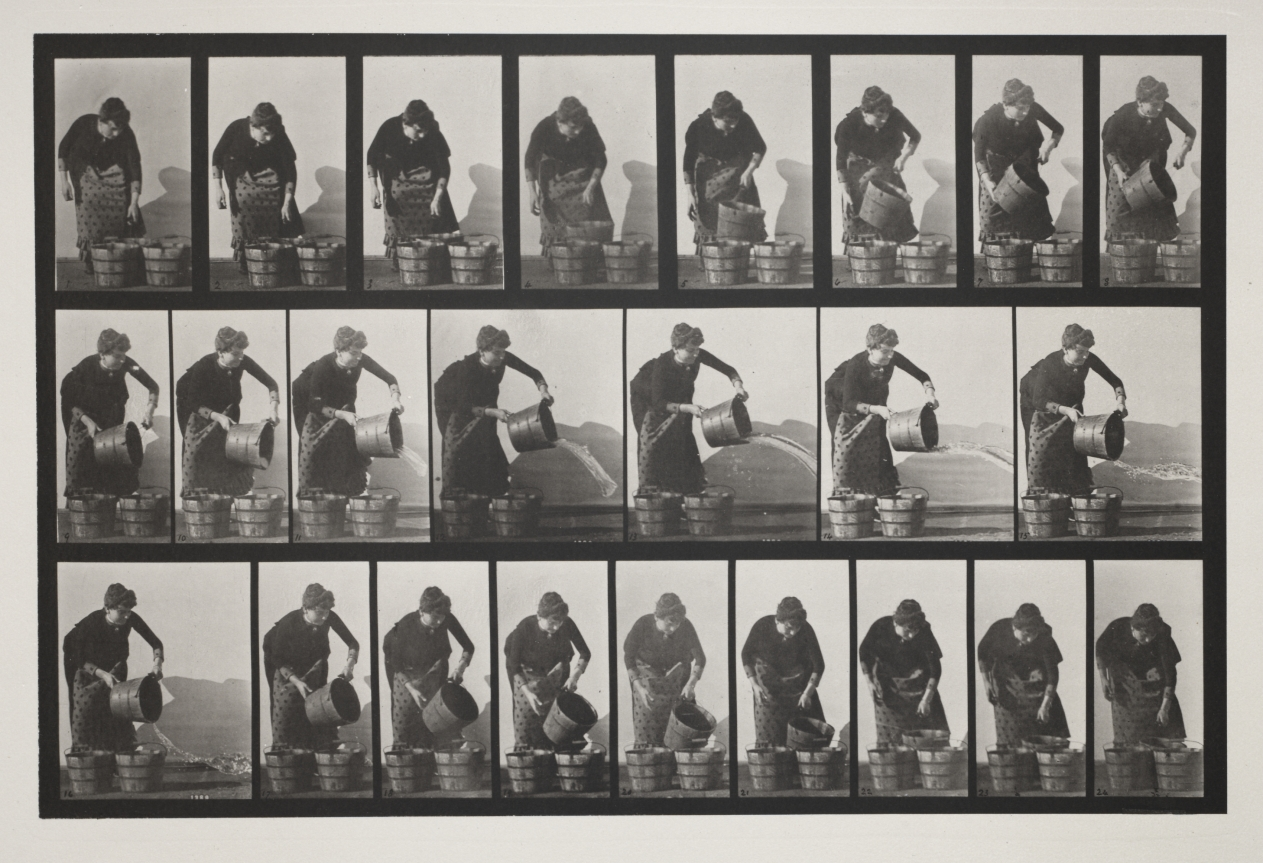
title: Emptying a Bucket of Water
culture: America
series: Animal Locomotion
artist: Eadweard J. Muybridge (American, 1830–1904)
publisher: University of Pennsylvania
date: 1887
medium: collotype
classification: Photograph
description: Eadweard J. Muybridge initially used horses to capture motion as separate slices of time faster than the human eye could perceive them, then moved on to study other animal and human movements. Everyday activities, like emptying a bucket of water, were broken down and sequenced back-to-back. This series was commissioned by the University of Pennsylvania and intended to diagnose dysfunction in human movement by allowing each consecutive action to be studied in isolation. The university’s desire for distribution called for the use of collotype. The process had been recently improved to the point where editions of up to 1,000 were possible, making it an attractive option for publishers.